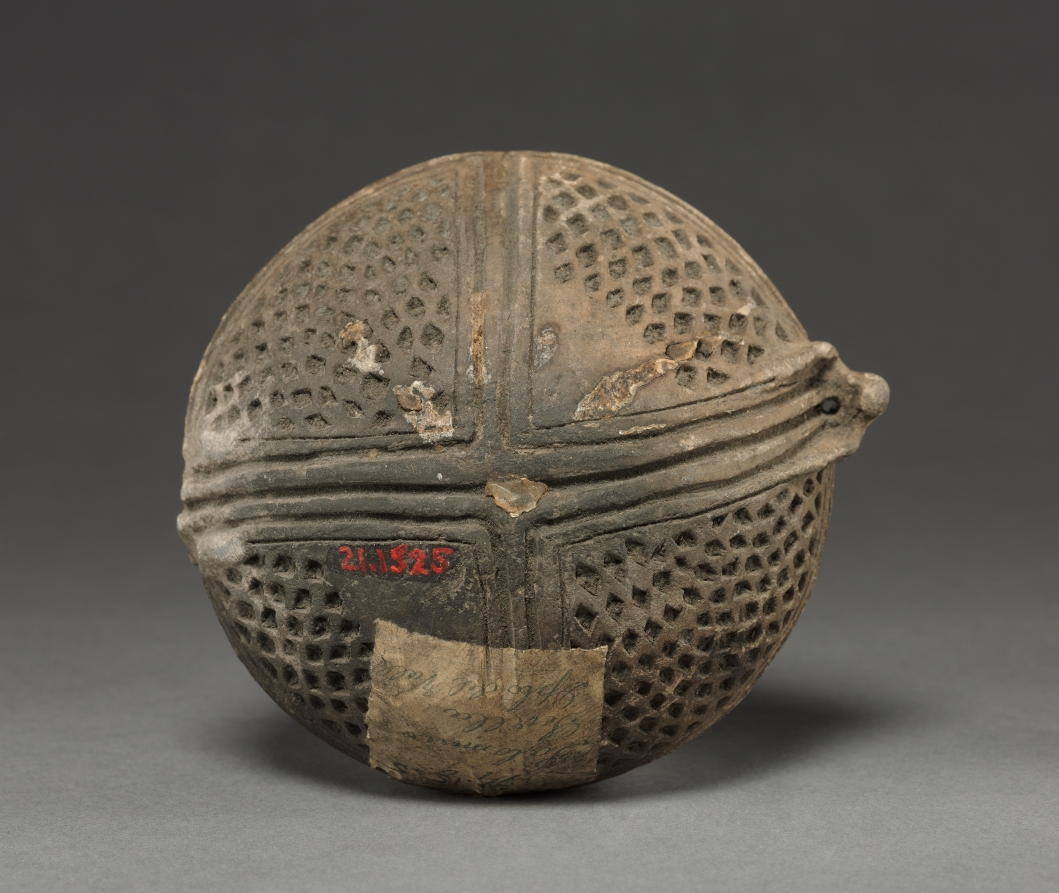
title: Jar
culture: Colombia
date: before 1550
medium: red ware with incised patterns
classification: Ceramic